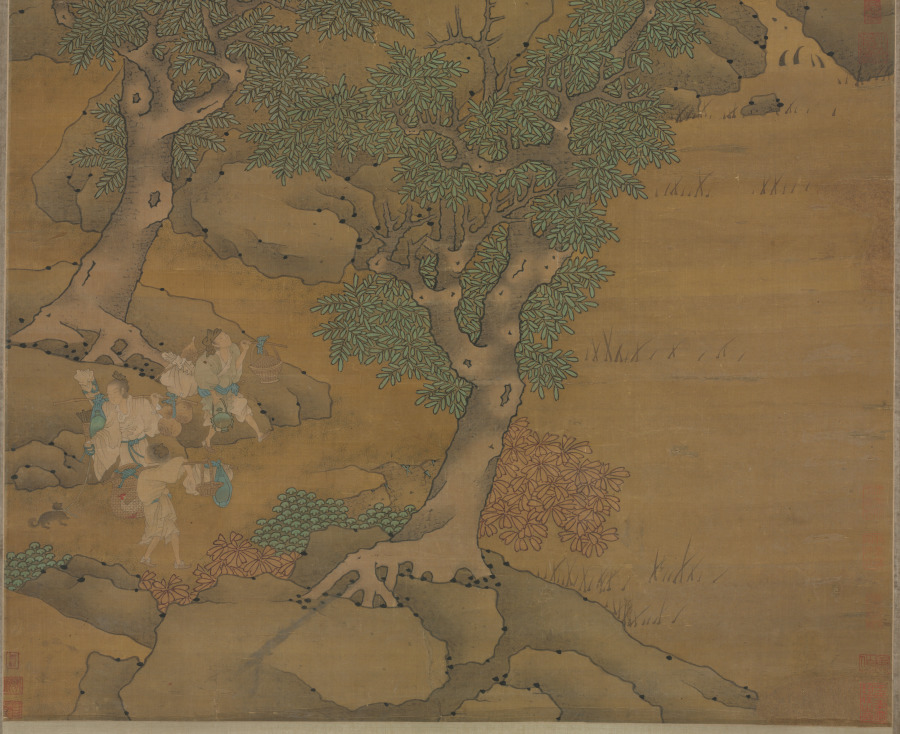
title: Xu Jingyang Moving His Family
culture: China, Ming dynasty (1368–1644)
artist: Cui Zizhong (Chinese, 1574–1644)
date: 1644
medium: Hanging scroll; ink and color on silk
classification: Painting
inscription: Artist's 2 seals: Pei-hai, Cui Zizhong yin.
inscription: 9 additional seals: 2 of Xiang Yuan (18th-19th c.); 1 of Tang Zuomei (late 18th-19th c.); 1 of Zhang Heng 張珩 (1915-1963); 1 of C. C. Wang 王季遷 (1907–2003); 4 unidentified.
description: Xu Jingyang was a dedicated fourth-century Confucian official who allegedly turned into a Daoist immortal. This scroll depicts the legend that when he attained immortality, he took his entire household, including chickens and dogs, to paradise. Cui Zizhong’s painting style intentionally referenced ancient masters. Typical of the pre-Song dynasty landscape tradition, there is the use of blue and green colors and an emphasis on outline rather than texture. While the trembling outlines are reminiscent of earlier painters, the flickering light on rocks and trees is a stylistic feature of Cui’s own time.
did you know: Xu Jingyang, wearing red, is in the upper register of figures, while below his servants transport a rooster, dog, and other supplies.